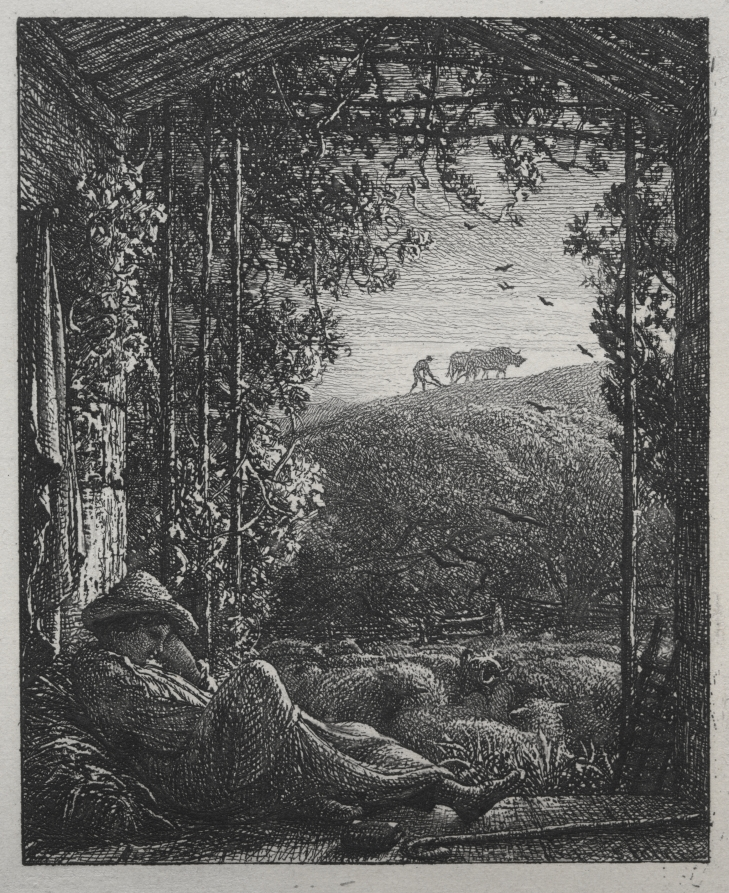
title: The Sleeping Shepherd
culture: England, 19th century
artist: Samuel Palmer (British, 1805–1881)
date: 1857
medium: etching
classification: Print